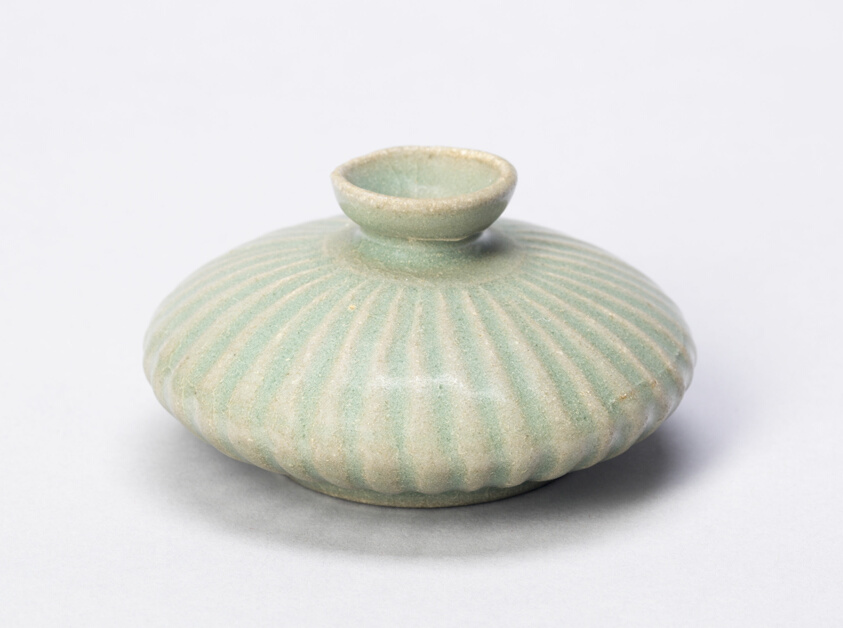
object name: Vessel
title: Lobed Jar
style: Korean (culture or style)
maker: Korea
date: Goryeo dynasty (918–1392), 12th century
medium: Stoneware with celadon glaze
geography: South Korea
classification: vessel